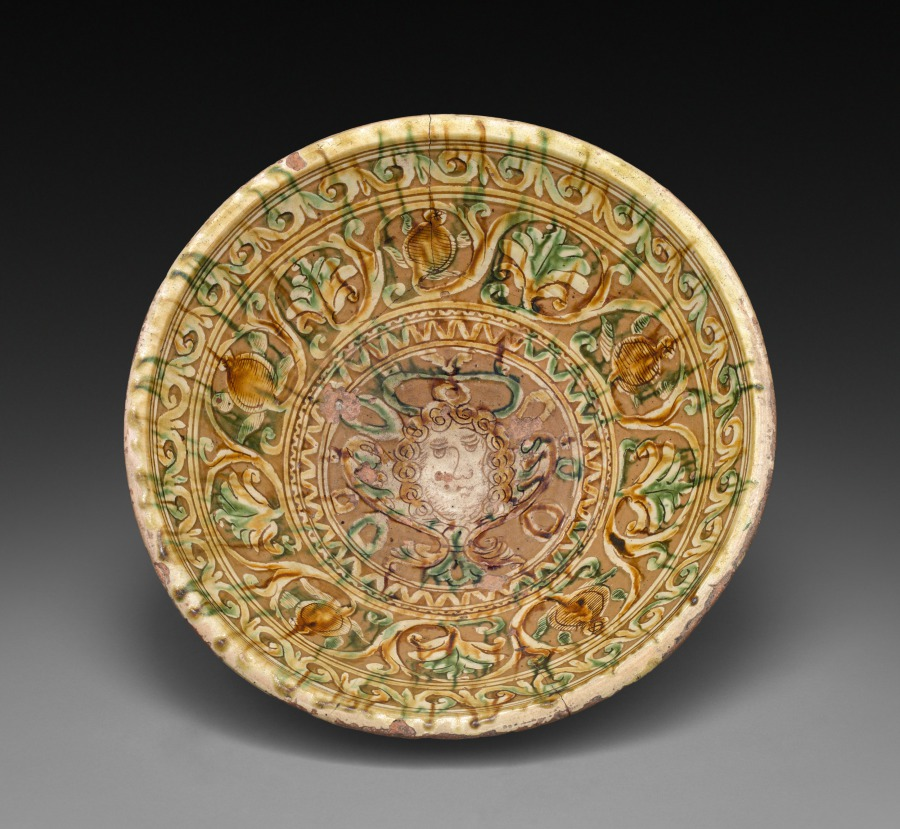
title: Bowl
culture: Italy, early 16th century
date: early 1500s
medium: reddish earthenware, incised slipware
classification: Ceramic